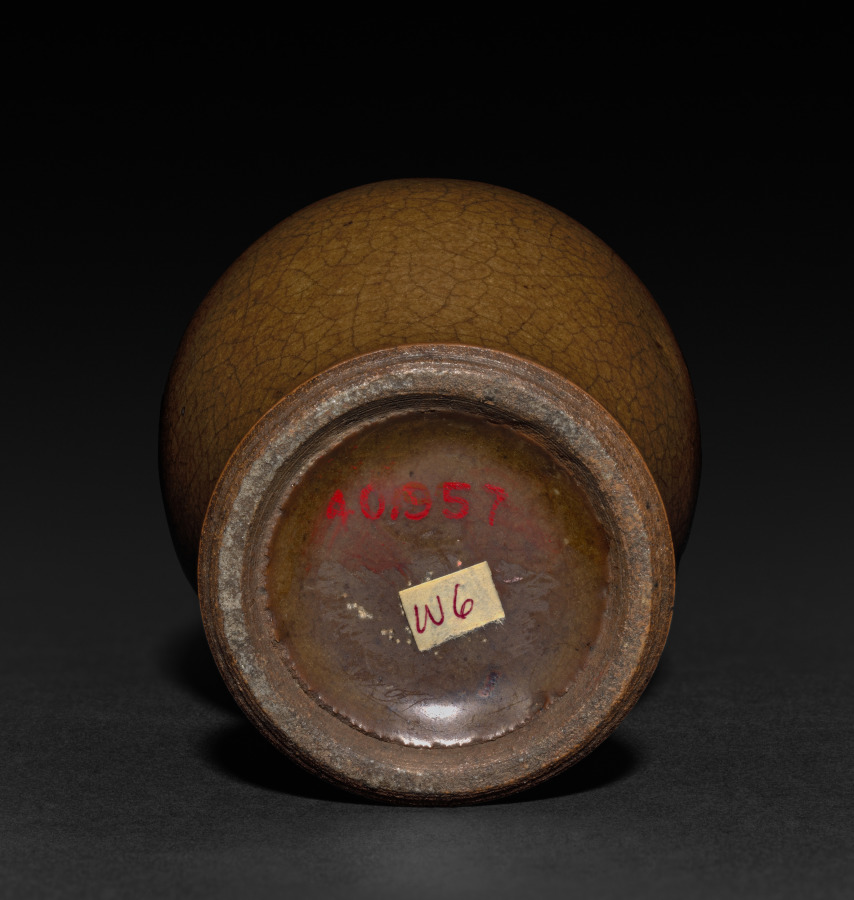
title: Vase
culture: China, Qing dynasty (1644-1911), Kangxi reign (1661-1722)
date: 1662–1722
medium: porcelain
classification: Ceramic